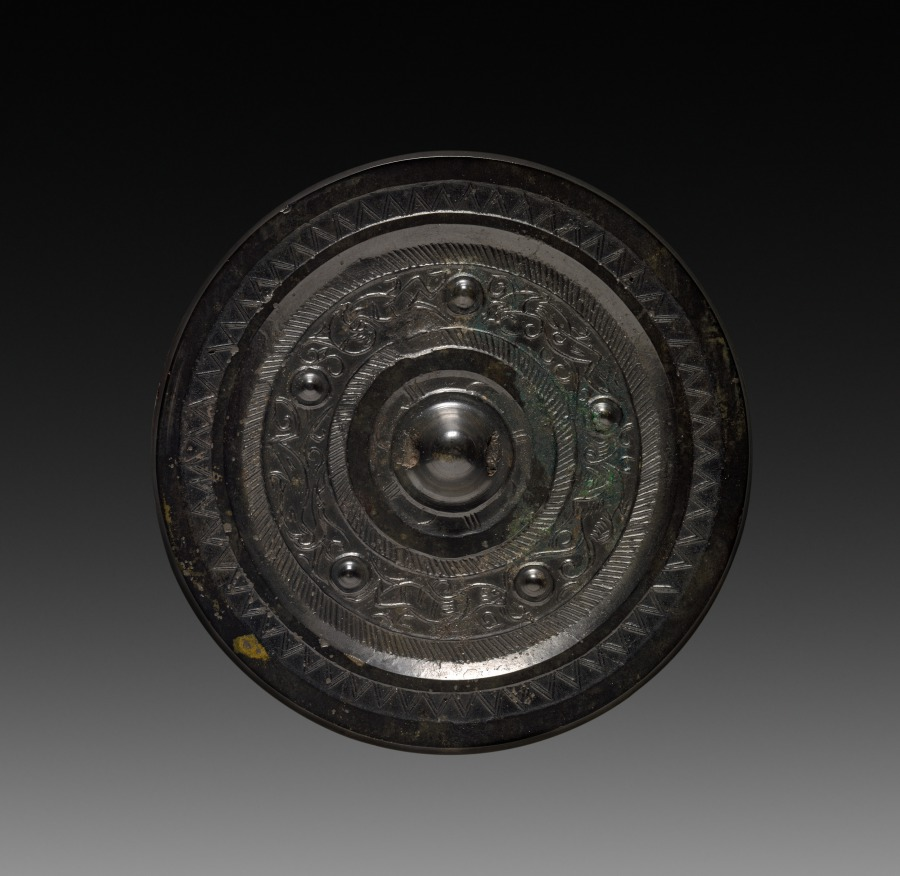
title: Mirror with Concentric Circles and Auspicious Animals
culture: China, Han dynasty (202 BCE–220 CE)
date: 206 BCE–220 CE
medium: bronze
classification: Metalwork